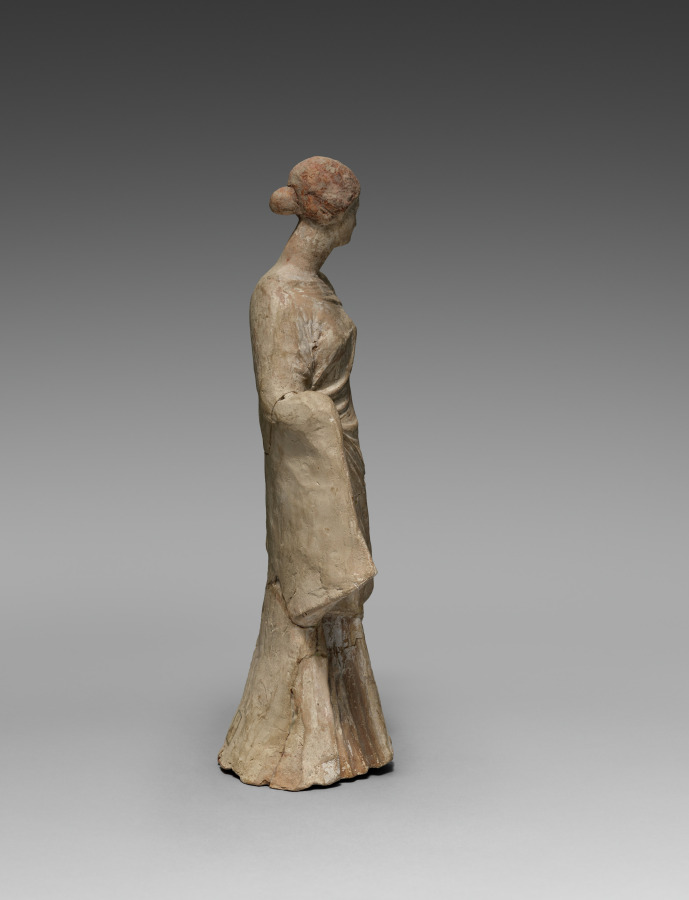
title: Figurine of Standing Woman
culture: Greece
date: 200s BCE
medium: terracotta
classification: Sculpture